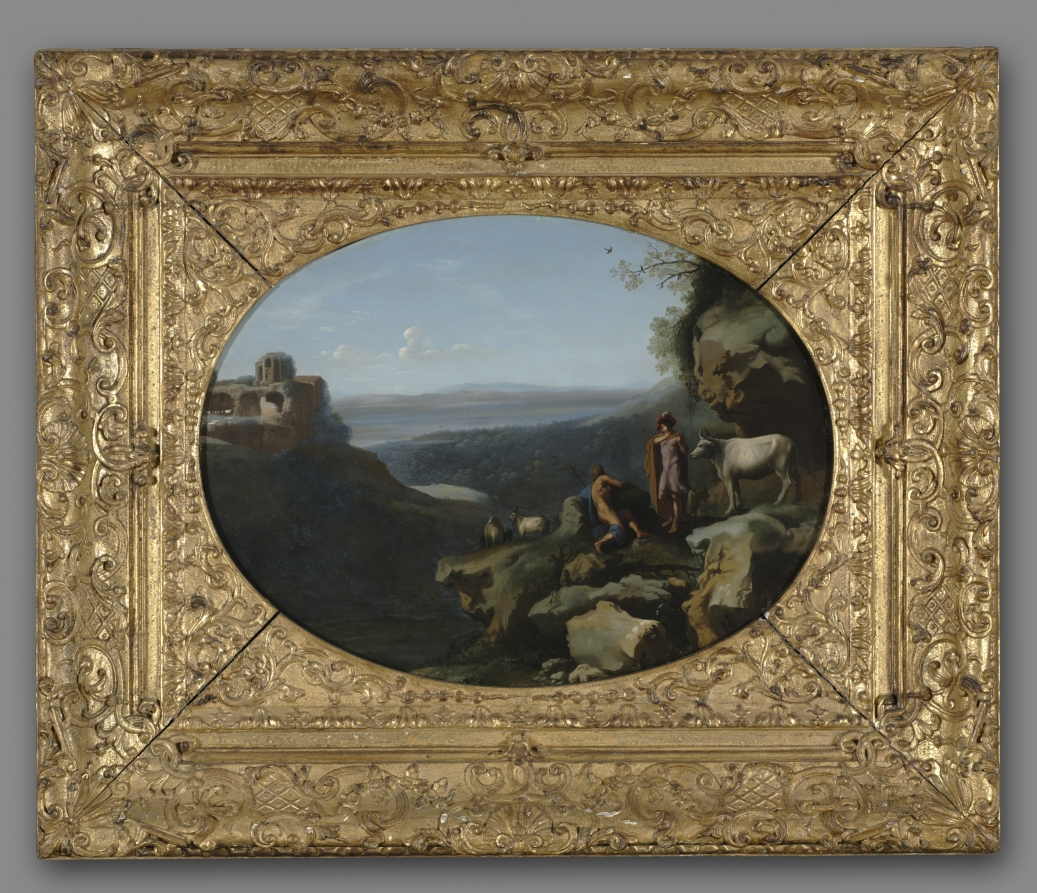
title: Mercury and Argus in a Landscape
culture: Netherlands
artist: Dirck van der Lisse (Dutch, 1669)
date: c. 1635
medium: oil on copper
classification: Painting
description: This painting depicts a scene from ancient myth. The queen of the gods, Juno, jealous of her husband Jupiter's affair with Io, changed the mortal woman into a cow. Juno then ordered Argus - a giant with many eyes - to watch over Io constantly. In response, Zeus sent Mercury, the god of deception, to free Io. Mercury lulled Argus to sleep by playing the flute, then killed him and released the cow. The artist set the scene in a landscape with classical ruins. The expansive vista belongs to an earlier tradition that evokes the immenseness of the world through panoramic views, offering the suggestion of boundless space.